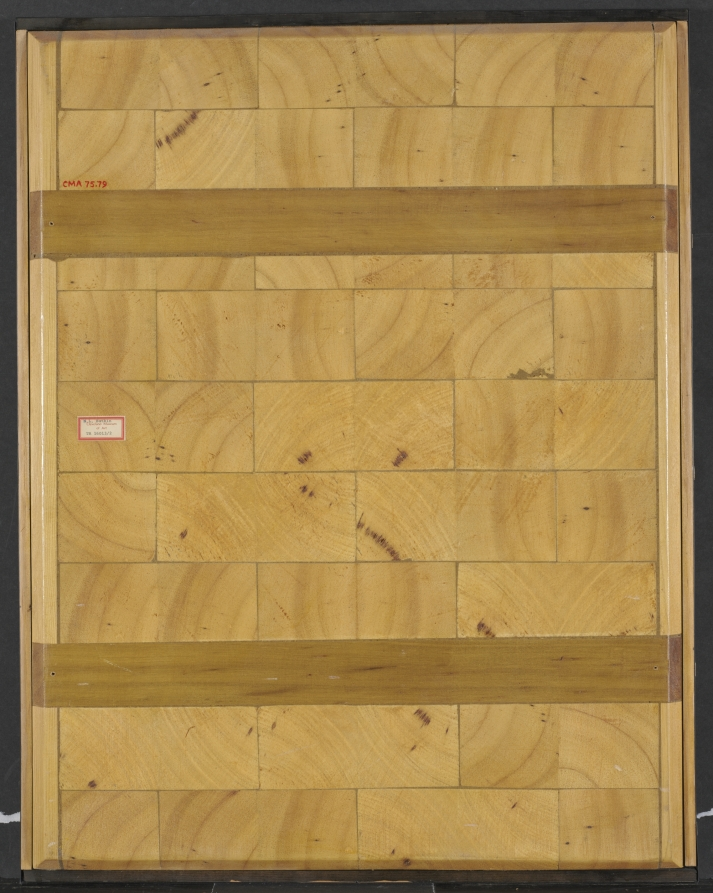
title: Salome with the Head of Saint John the Baptist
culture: Netherlands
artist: Jacob Duck (Dutch, c. 1600–1667)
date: mid-1600s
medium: oil on wood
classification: Painting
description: The colorful, exotic garments worn by the woman at the right demonstrate Jacob Duck’s skill in painting luxurious surfaces: she is Salome, daughter of Herodias. According to the New Testament, Herodias bore a grudge against John the Baptist, who condemned her marriage to Herod, ruler of Galilee and Perea. At a celebration dinner, Salome so charmed Herod with her dancing that he offered her anything she desired—and Herodias convinced Salome to demand John the Baptist’s head. Rather than depicting the actual execution, Duck focused on the executioner’s muscled physique as he departs the scene, turning to look at the viewer after having presented Salome with John’s severed head.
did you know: The pommel of the executioner's sword is decorated with a grotesque head, suggesting an ancient or exotic setting for this event.